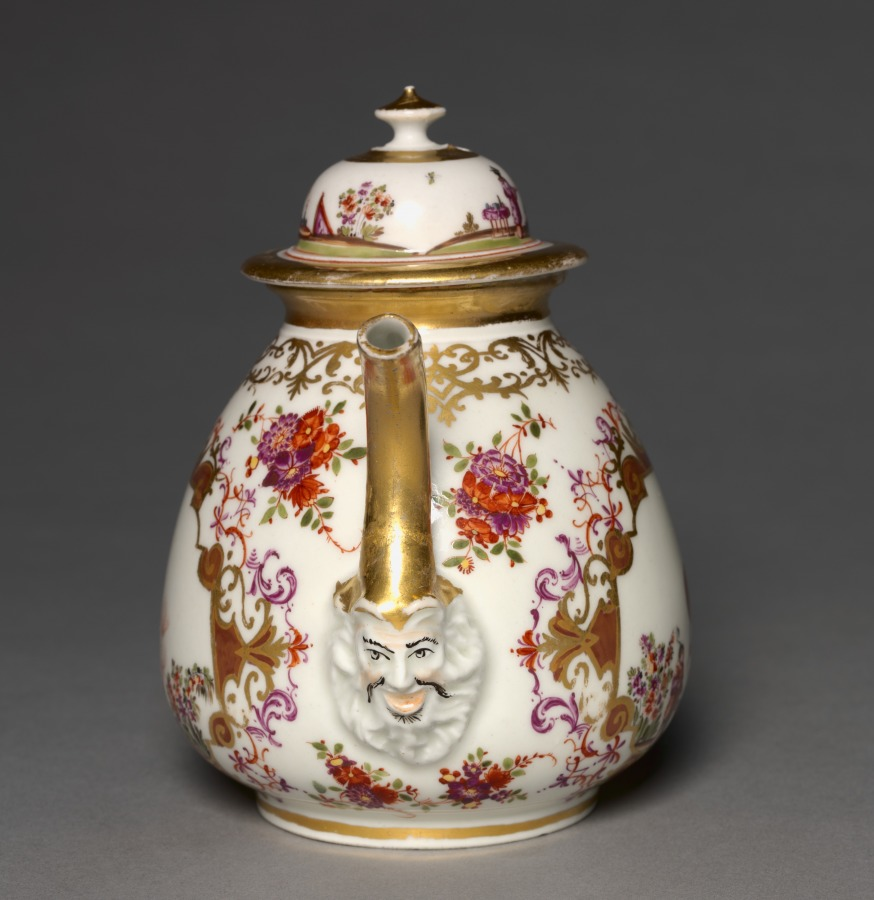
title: Tea Pot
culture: Germany, Meissen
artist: Meissen Porcelain Factory (German, est. c. 1710)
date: c. 1723–24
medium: gilt porcelain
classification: Ceramic